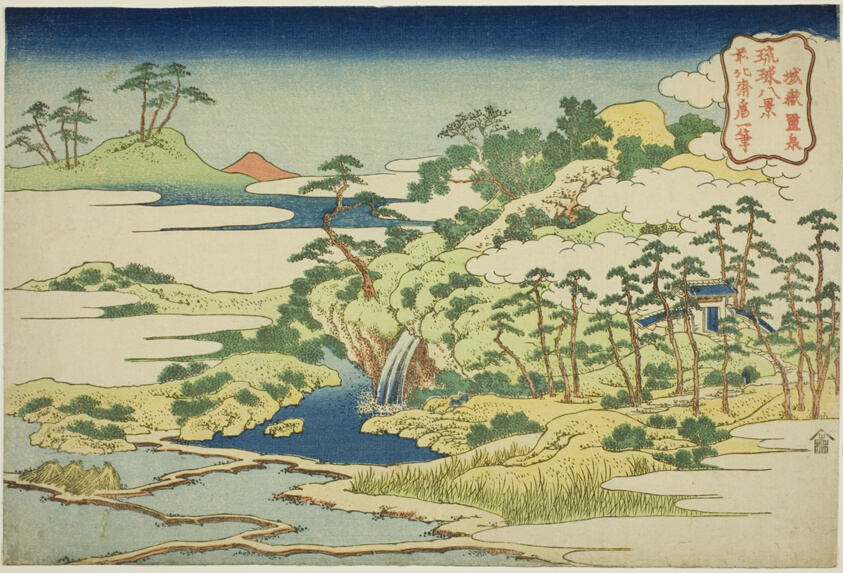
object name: Print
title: The Sacred Spring on Fortress Mountain (Jogaku reisen), from the series "Eight Views of the Ryukyu Islands (Ryukyu hakkei)"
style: Japanese (culture or style)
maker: Katsushika Hokusai 葛飾 北斎; Japanese, 1760-1849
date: c. 1832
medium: Color woodblock print; oban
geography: Japan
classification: woodblock print; print; asian art